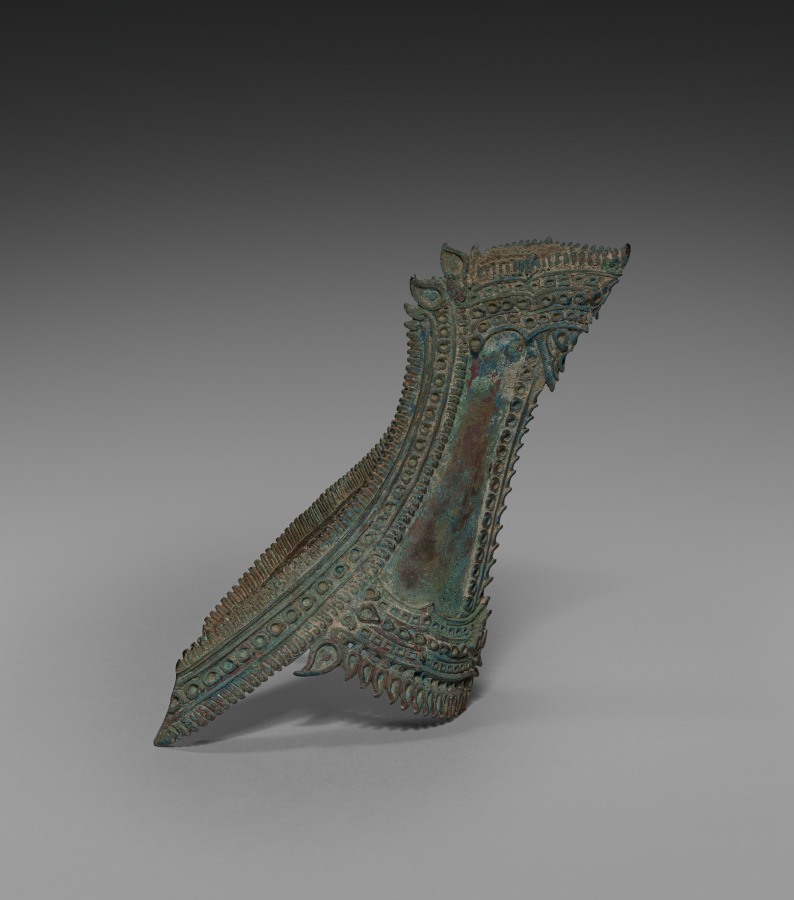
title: Sheath for ritual conch shell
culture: Cambodia, Khmer, Angkor period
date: 1100s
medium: shell and bronze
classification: Sculpture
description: A royal temple like Banteay Chhmar was built for performing rituals and to honor images of gods, Buddhas, and other sacred or enlightened beings for the sake of the kingdom’s protection and ongoing prosperity. Conch shells were blown at the start of rituals to make the sound corresponding to the syllable om. The dancing figure of Hevajra, a Buddhist being of enlightenment with eight heads, sixteen arms, and four legs, has been worked into the bronze embellishment of the shell. Hevajra was elevated to a prominent position in Khmer Buddhism of the Angkorian period as the standard figure denoting the practice of rituals prescribed in a text called the Hevajra-tantra. The tripod stand with three serpents is probably not original to the shell.